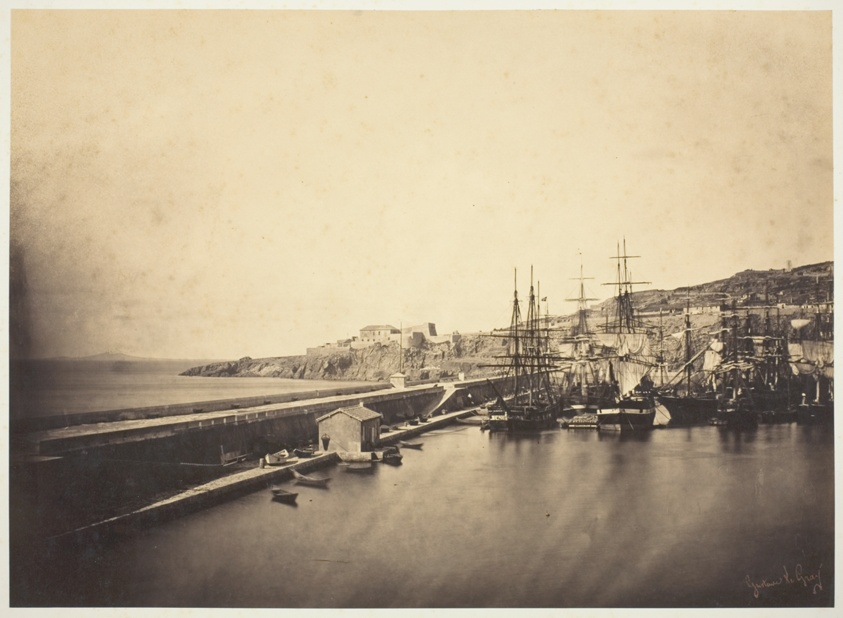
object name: Photograph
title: The Jetty at Sète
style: 19th century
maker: Gustave Le Gray (French, 1820–1884)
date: 1857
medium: Albumen print, No. 12 from the album "Vistas del Mar"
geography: France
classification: albumen silver print; photographic process; photography; photograph